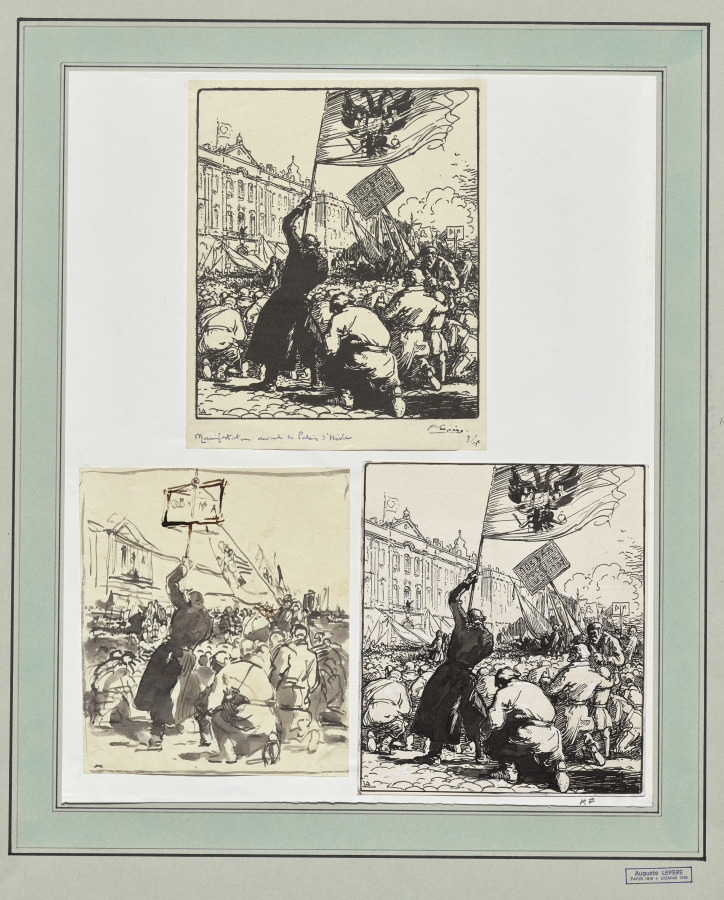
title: Manifêstation devant le Palais d'Hiver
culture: France, 20th century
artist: Auguste Louis Lepère (French, 1849–1918)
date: 1914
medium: pen and brush and black ink over pencil with white highlights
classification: Drawing